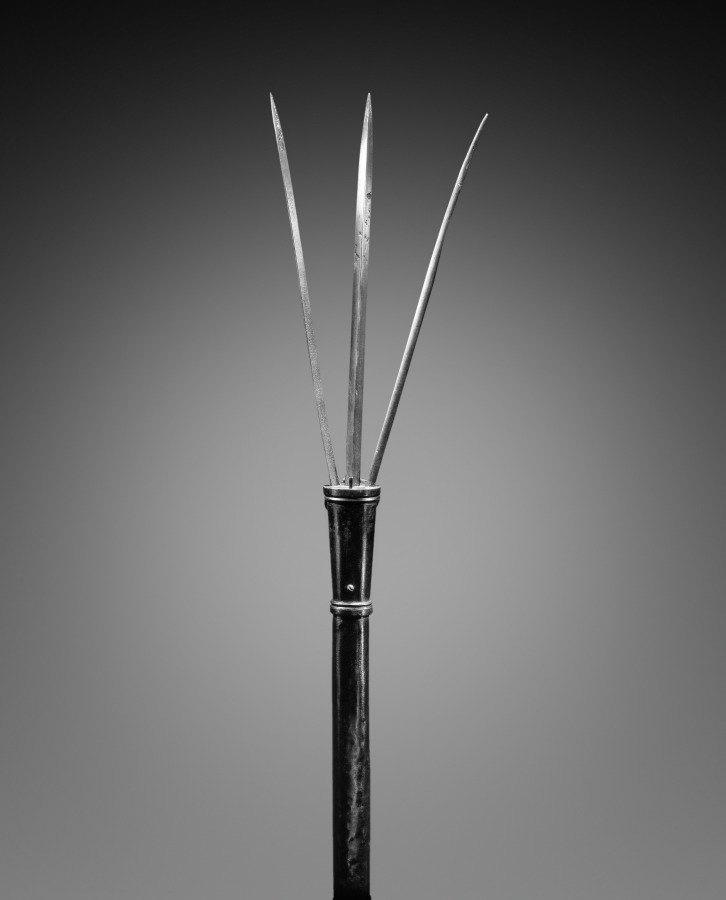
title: Brandistock (with retractible blades)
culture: Italy, early 17th century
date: c. 1600–25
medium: steel; round wood haft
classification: Arms and Armor